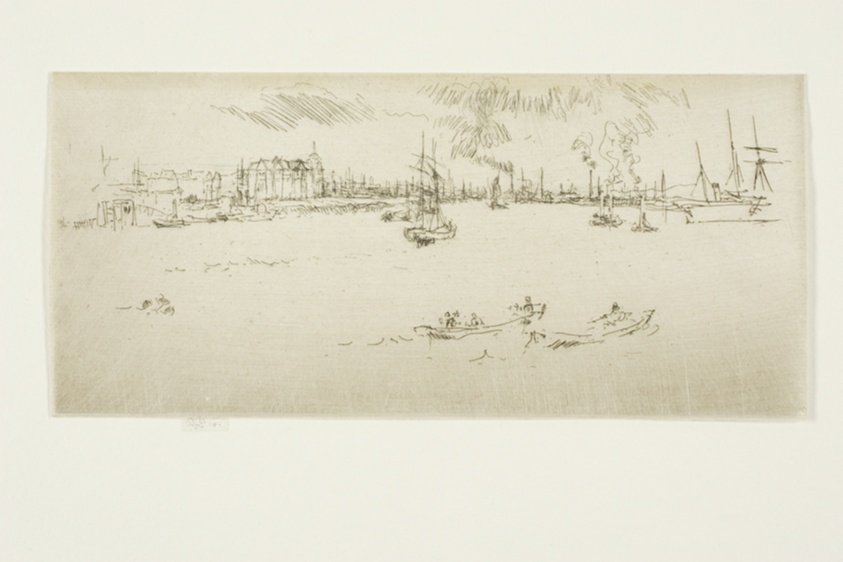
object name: Print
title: Tilbury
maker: James McNeill Whistler (American, 1834-1903)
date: 1887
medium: Etching and drypoint with foul biting in black ink on cream wove paper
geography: United States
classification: etching; foul biting; print; prints and drawing; drypoint; paper